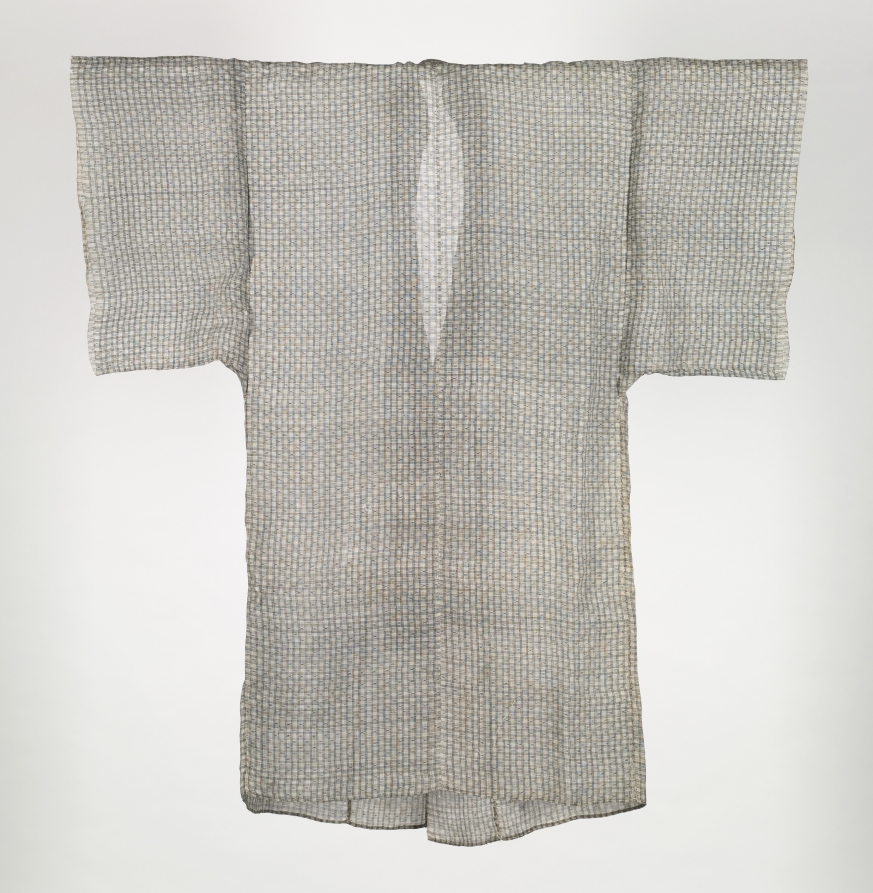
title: Robe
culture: Japan, Edo period (1615–1868)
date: early 1800s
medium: banana cloth, tabby weave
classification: Garment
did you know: This robe was produced in the Ryukyu Islands, a chain of islands between Kyushu and Taiwan.